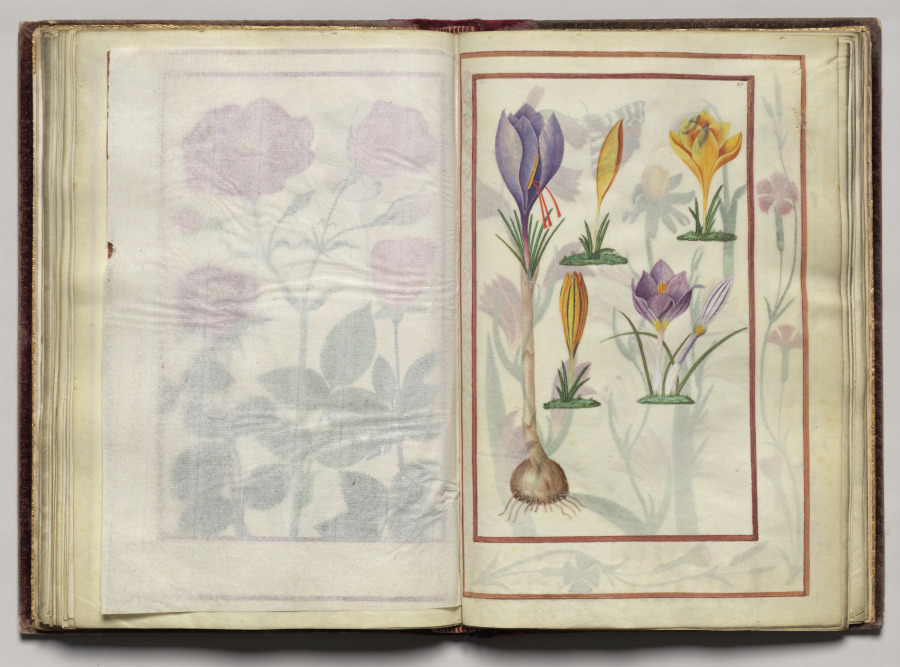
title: Crocus, folio 34 (recto), from Florilegium (A Book of Flower Studies)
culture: France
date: 1608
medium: watercolor, ink, silver, and gold over occasional traces of pencil, on vellum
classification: Bound Volume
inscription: Dated: Poitiers 1608 (on frontispiece) Signed: On frontispiece in black ink, lower right: Van Kuyk Notation on drawing: Frontispiece: in pencil, lower margin: * élève de Van Kessel, peintre flammand (* in pencil also appears in front of Van Kuyk's name).